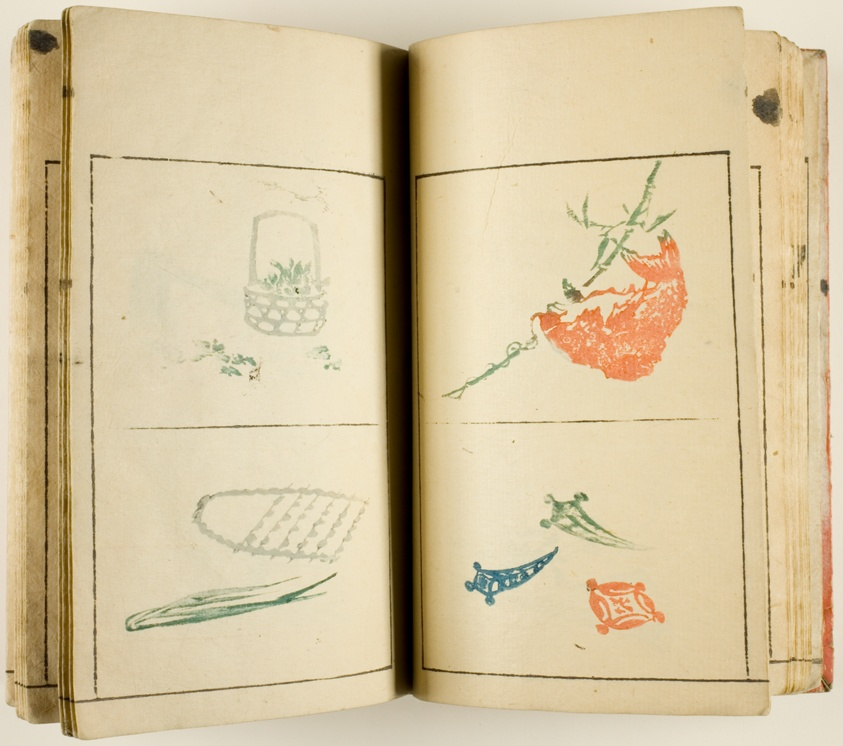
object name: Book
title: Keisai soga (Sketches of Keisai), one vol. of 5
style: Japanese (culture or style)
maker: Kitao Masayoshi (Kuwagata Keisai) (Japanese, 1764–1824)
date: 19th century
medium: Book; woodblock printed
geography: Japan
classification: book; woodblock print